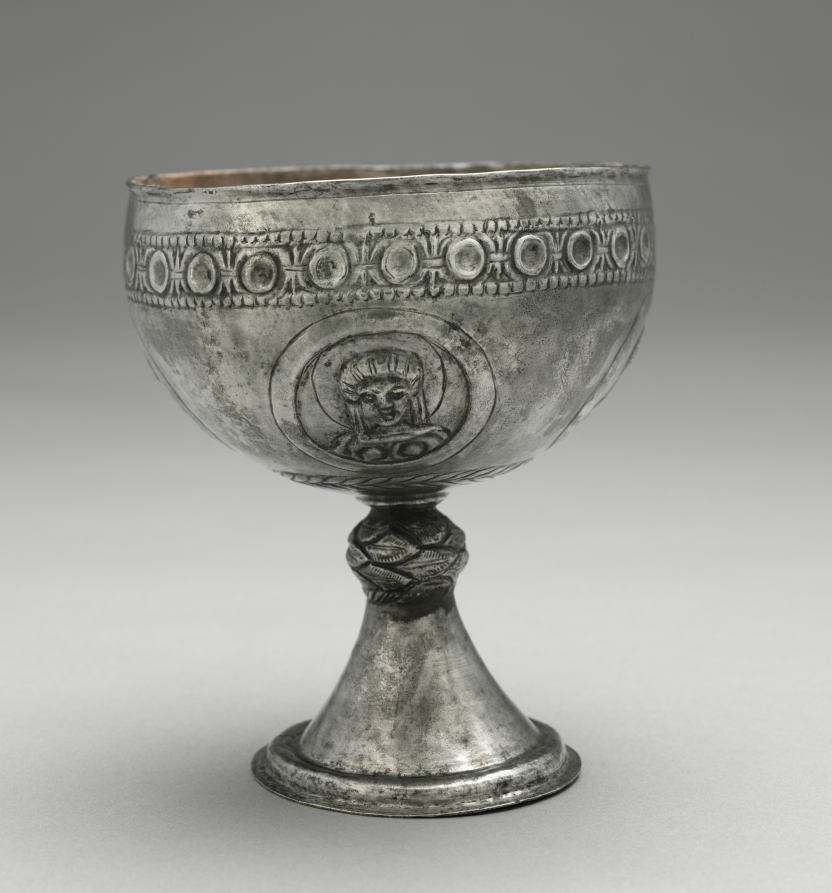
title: Chalice from the Beth Misona Treasure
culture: early Byzantium, Constantinople or Syria, Byzantine period, 6th-7th Century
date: c. 500–700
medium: silver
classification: Metalwork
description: These four liturgical silver vessels—a paten and three chalices (1950.378–81)—form what is now called the Beth Misona Treasure, named for the village in northern Syria for which the objects were made. While nothing is known about the exact location and circumstances of the treasure's discovery, the people of the village of Beth Misona were, like other Christian communities in Syria and Palestine, probably forced to bury their church silver to hide it from the Persians or Arabs, who conquered their lands in the first half of the 600s. The paten, which held pieces of Eucharistic bread used during Mass, is decorated with an engraved Latin cross surrounded by a dedicatory inscription that names the paten's donor—Domnos—and its original location, the church of Saint Sergios in Beth Misona. The chalices, which contained the Eucharistic wine used during Mass, feature broad cups decorated with portrait busts of Saints Peter and Paul, Christ, and the Virgin. One chalice bears a dedicatory inscription naming its donor—Kyriakos, Domnos's son—and the priest of the church that received the pious gift—Zeno.